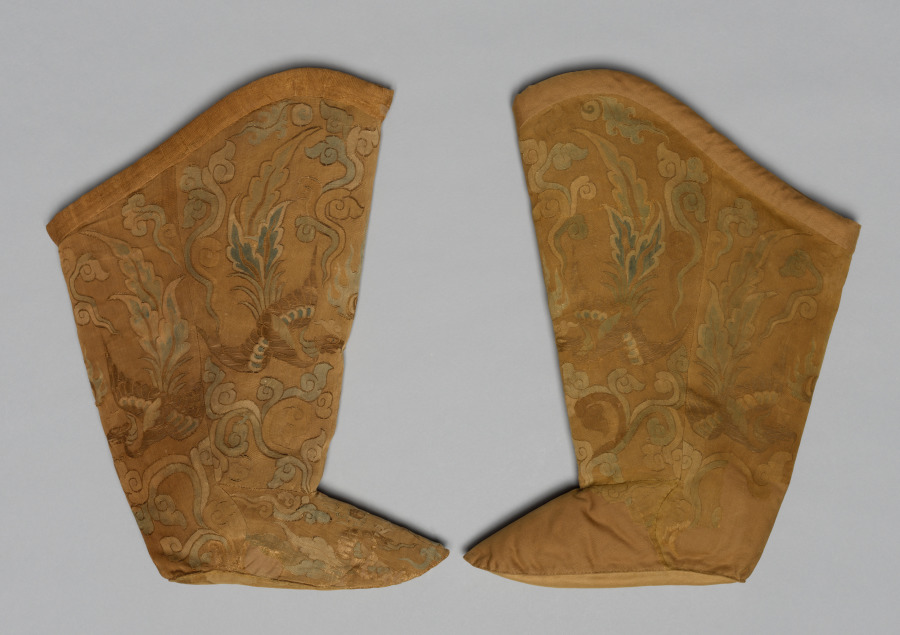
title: Pair of Boots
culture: Northern China, Liao dynasty (907-1125)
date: 907–1125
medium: Silk: tapestry weave; two kinds of metal threads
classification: Textile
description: This magnificent pair of boots, made of finely woven silk tapestry (kesi), features two phoenixes in flight chasing a flaming pearl. Although the bright colors of the fabric have become muted from being buried in a tomb and the gold threads are partly disintegrated, the once lavish use of gold and the Chinese-inspired phoenix motif suggest that the boots were made for a member of the Liao imperial family, probably a woman. At the time the boots were made in the Khitan-occupied territory in northern China, footbinding was introduced among upper-class women in southern China. The high value the Khitan people accorded to boots relates to their mobile, seminomadic lifestyle.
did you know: The boots have a complete padding and lining, but the soles do not show signs of being worn.